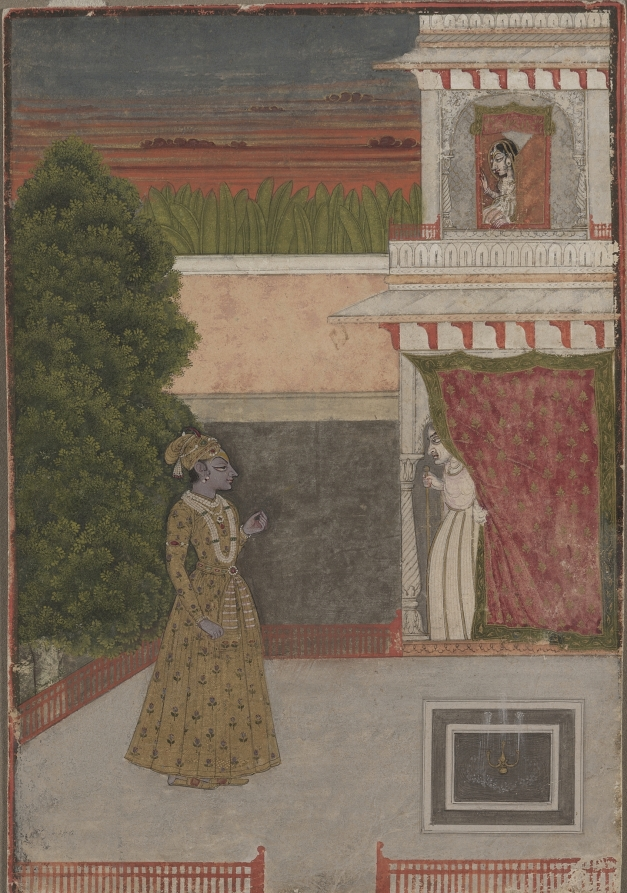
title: Lovers and an Old Crone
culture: Northwestern India, Rajasthan, Kishangarh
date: c. 1780–90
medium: color on paper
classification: Painting